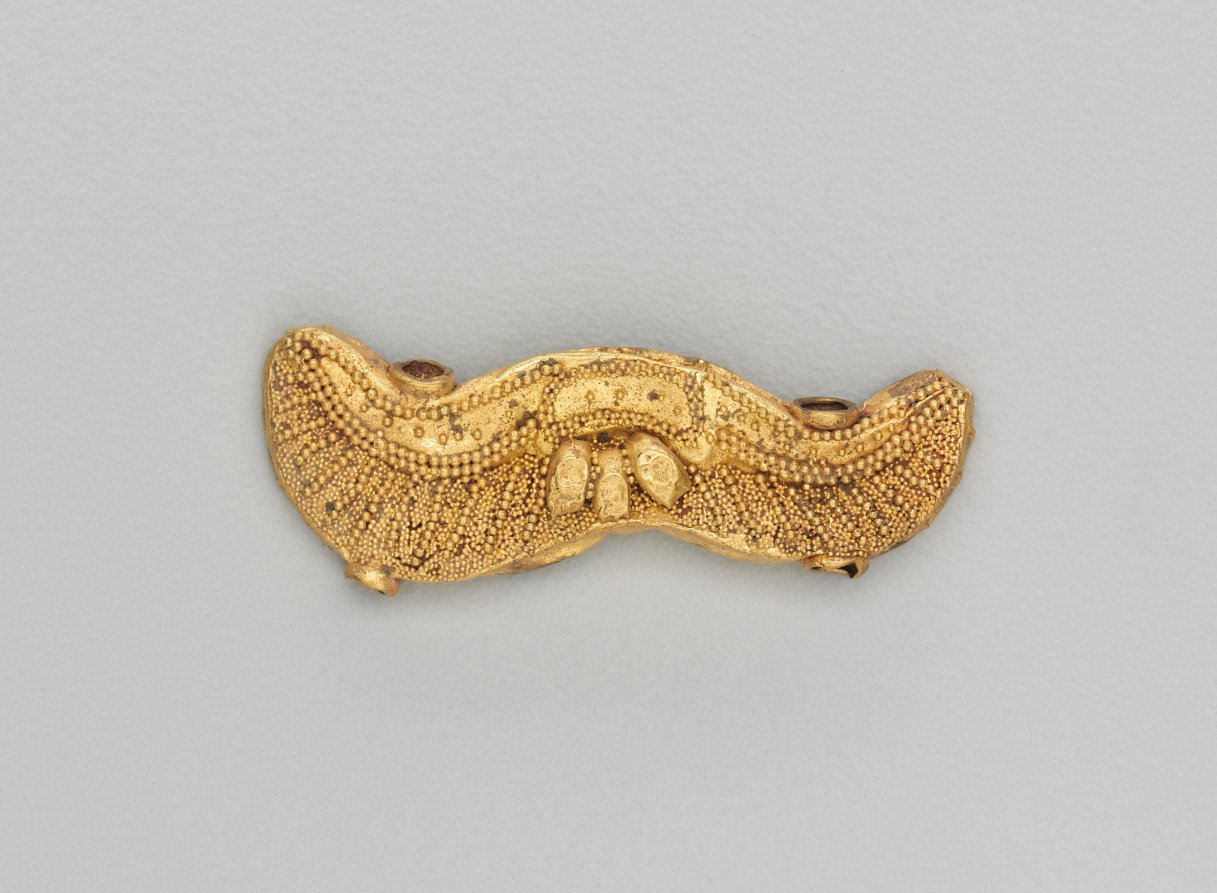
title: Set of Pendants Ending in a Bull's Head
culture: India, Shunga period (185–78 BCE)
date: 185–72 BCE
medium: gold repoussé with granulation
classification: Jewelry